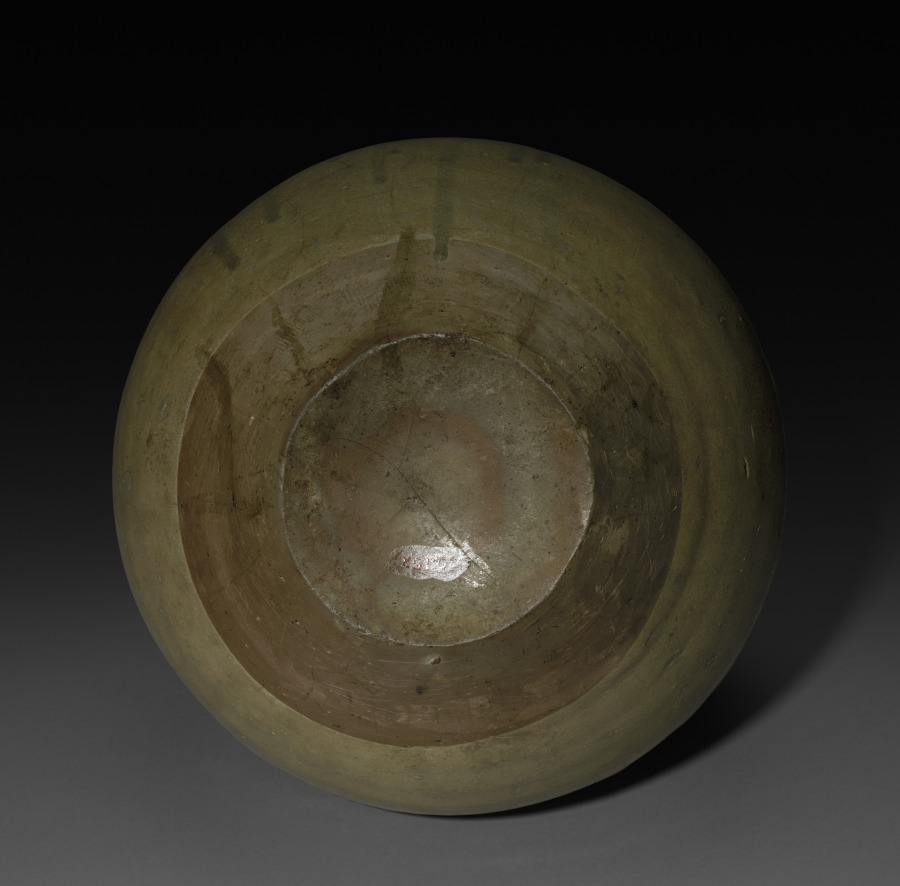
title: Jar with Tiger-Headed Spout: Yue Ware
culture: China, Western Jin dynasty (265-316 CE)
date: late 200s–late 300s CE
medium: glazed stoneware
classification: Ceramic